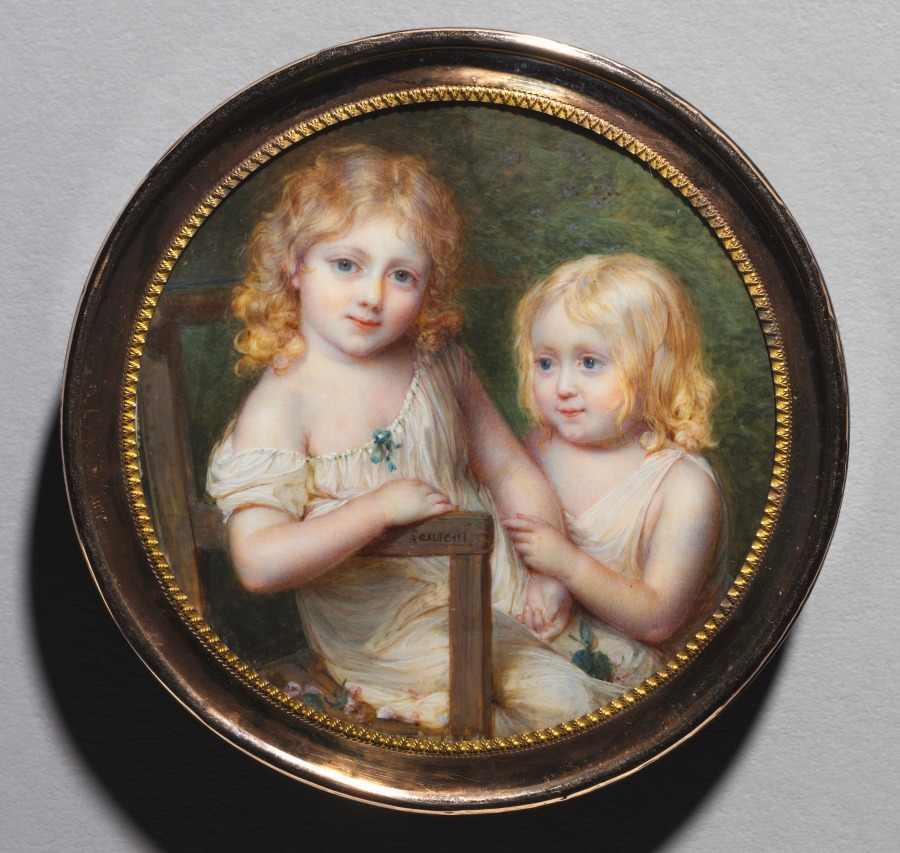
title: Portrait of the Artist's Children Emma and Paul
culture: France, 18th century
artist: Jean-Antoine Laurent (French, 1763–1832)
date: c. 1795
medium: watercolor on ivory, gold mount, set in the cover of a composition bonbonniere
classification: Portrait Miniature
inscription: signed at mid-center "Laurent"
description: This sensitive depiction of his children exhibits Laurent's ability to portray the psychological interiority of his subjects, young or old. The miniature shows Laurent's son and daughter in white chemise gowns with green ribbon accents. They both have striking blue eyes and slightly curled blond hair. The younger sibling tenderly holds the arm of the older one, who sits on a chair strewn with pink rose petals and inscribed with the artist's signature. The children are placed within an environment in which green foliage sprouts small blue and purple flowers. This organic setting reflects 18th-century Western philosophies of natural child rearing, characterized by treating childhood as a period of innocence distinct from adulthood and advocating that children not be treated as miniature adults but instead should have their naiveté celebrated. This philosophy influenced children's clothing. Instead of dressing children as small adults in constrictive costumes, both genders wore loose chemises, like the ones seen here, that encouraged mobility.